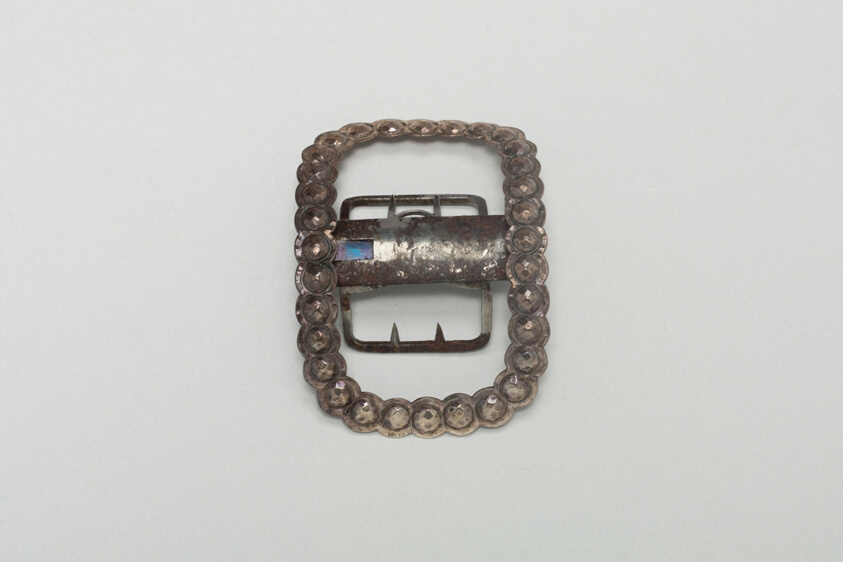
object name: Metalwork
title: Shoe Buckle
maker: Edward Fennel; English, active 1780-91; London, England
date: 1784/85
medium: Silver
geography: England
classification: buckle (strap accessory); jewelry; costume accessory; european decorative arts; metalwork